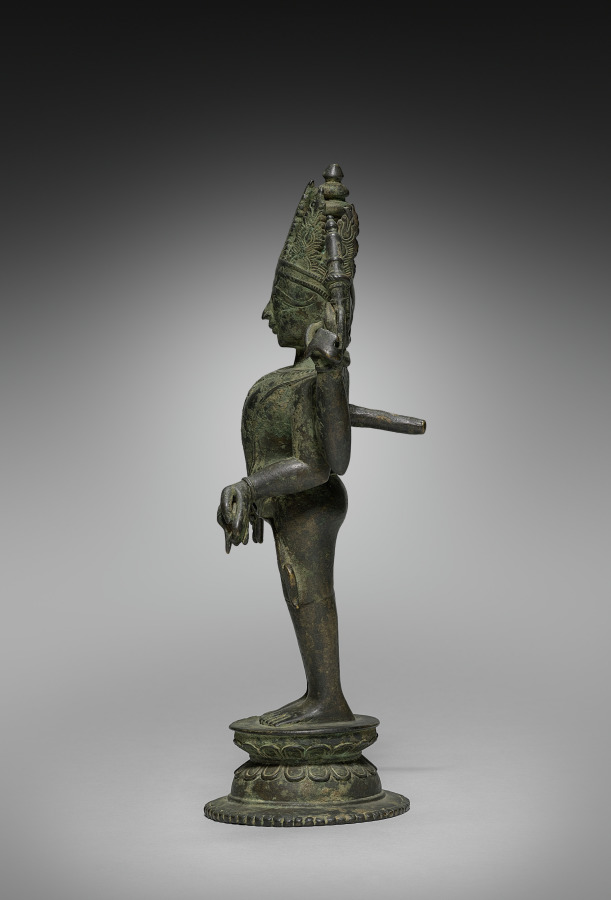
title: Vasudeva - Vishnu - Narayana as Shridhara, one of the 24 forms of Vishnu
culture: West India, 16th-17th century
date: 1500s–1600s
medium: brass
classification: Sculpture